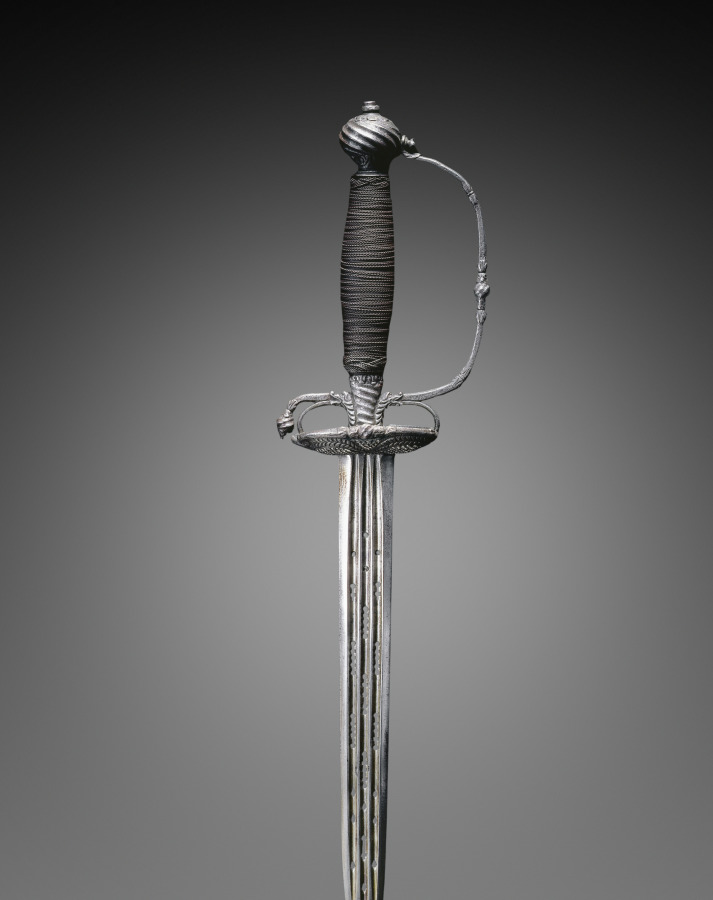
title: Small Sword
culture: England, 18th century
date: c. 1720–60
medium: steel; piercing; perforation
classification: Arms and Armor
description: During the 1700s, the small-sword emerged as a light, quick weapon. Like the rapier it was carried by unarmored civilians, the noblemen of the upper classes. Over time this delicate sword became more an accessory of male attire than a weapon essential to life and death. The sword hilt, which shows even when the blade is sheathed, became the ground for elaborate decoration. These small-swords thus represent the final stage in the evolution of the sword, from the edged weapons of antiquity to the elegantly refined blades of the 1700s and 1800s.